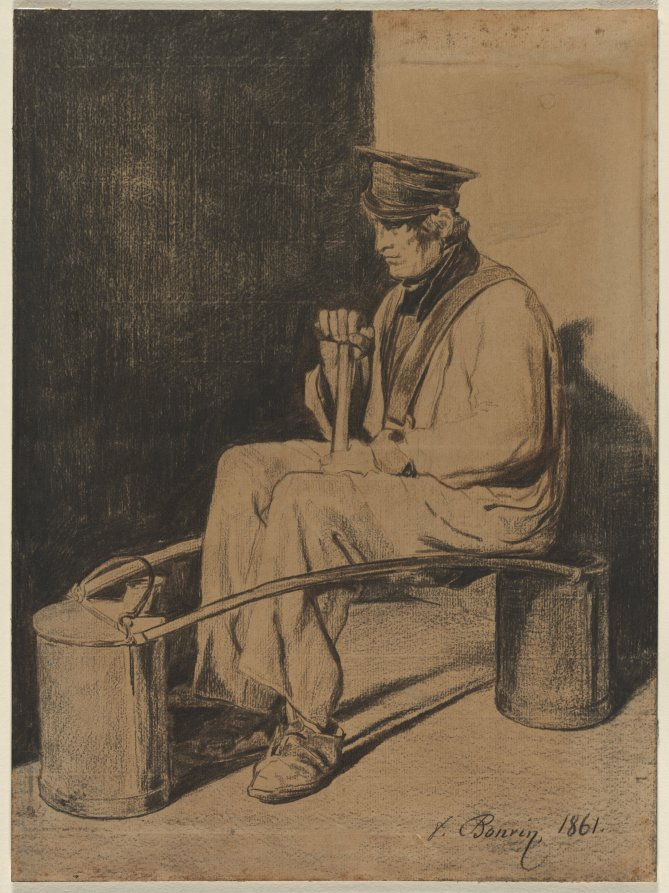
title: Water Carrier Seated on His Yoke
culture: France, 19th century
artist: François Bonvin (French, 1817–1887)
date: 1861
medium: black chalk and brown crayon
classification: Drawing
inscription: signed, lower right, in black chalk: f. Bonvin. 1861.